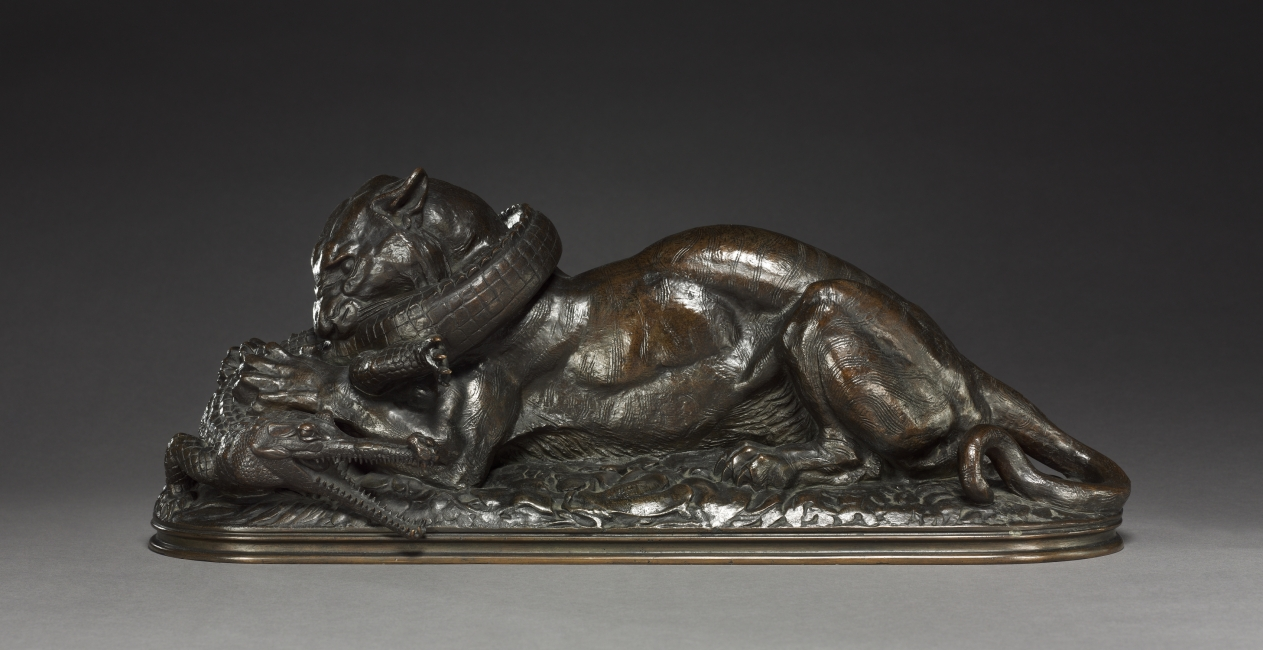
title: Tiger Devouring a Gavial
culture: France, 19th century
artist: Antoine-Louis Barye (French, 1796–1875)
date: 1831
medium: bronze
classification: Sculpture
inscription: Signed: "BARYE"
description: A large reptile of southern Asia, the gavial is related to and resembles a crocodile.